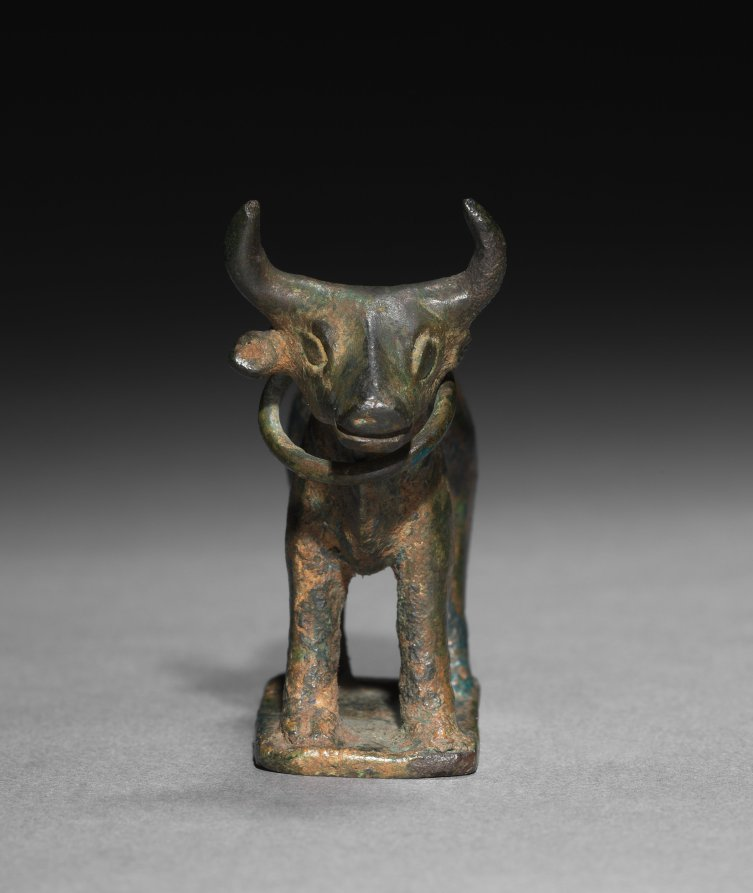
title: Statuette of a Bull with Curved Horns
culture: Egypt(?)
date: late 2000s BCE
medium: bronze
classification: Sculpture